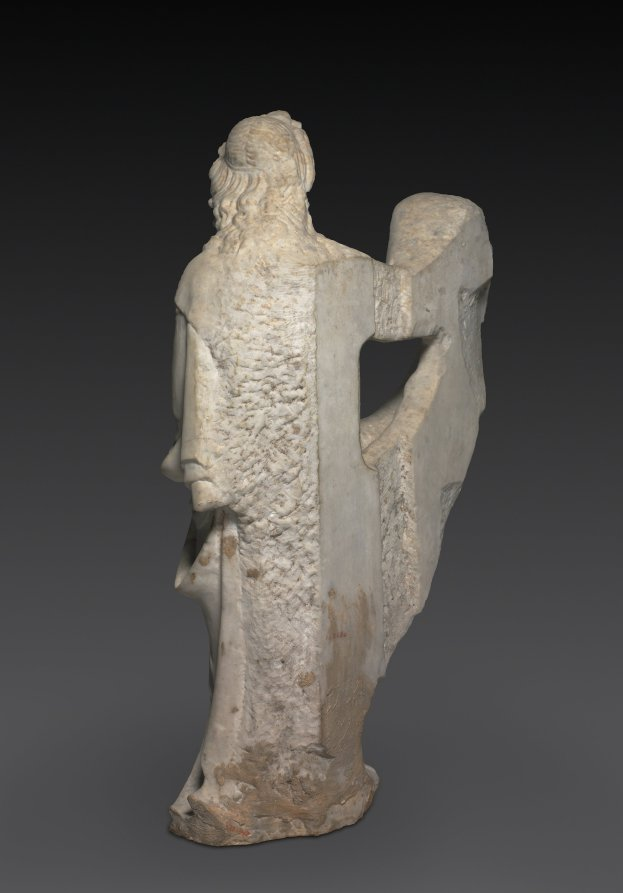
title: Angel from a Tomb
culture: Italy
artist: workshop of Tino di Camaino (Italian, c. 1285–1337)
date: 1330–50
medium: marble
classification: Sculpture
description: Tino da Camaino was active in Siena, Pisa, and Florence after 1311 where he established his reputation as an important and gifted sculptor. In 1323 he was summoned to the Angevin court at Naples, probably by King Robert of Anjou to work on the sepulchral monument of the king's daughter-in-law, Catherine of Austria. During the remainder of his life, Tino created a remarkable series of tomb sculptures in Naples. This pair of marble angels most likely represents the work of a member of Tino's workshop produced for one of these Neapolitan tombs, either during the final years of the master's life, or else independently after Tino's death in 1337.